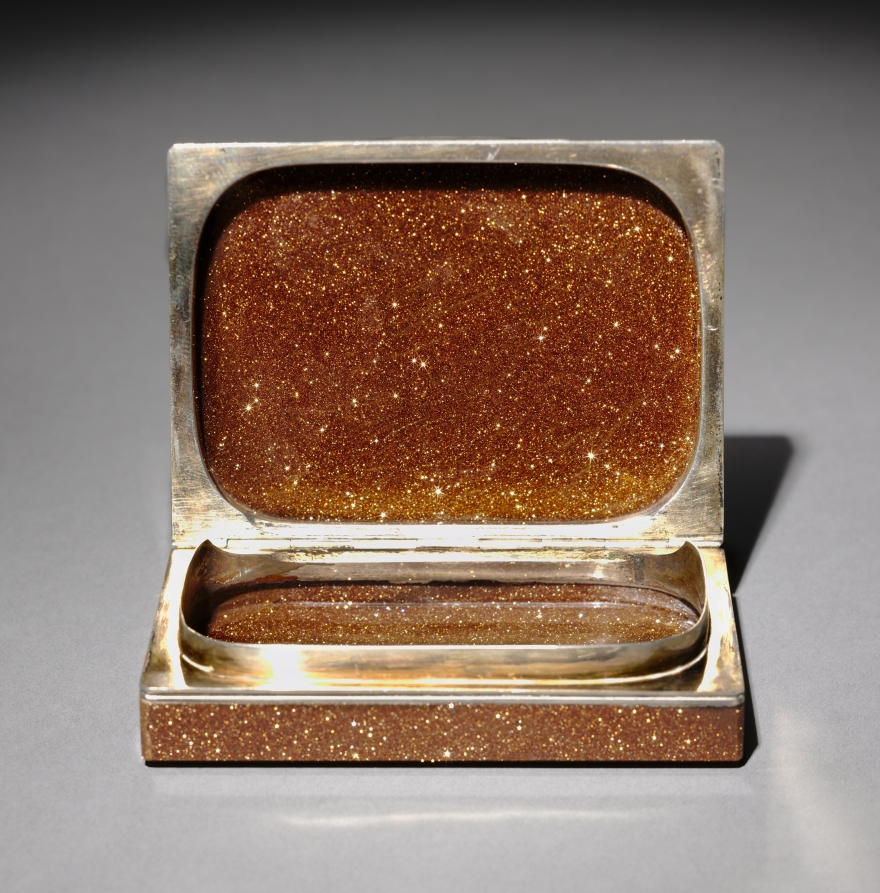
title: Snuff Box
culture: Italy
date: 1860–70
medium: goldstone, gold, micro mosaic glass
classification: Enamel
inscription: no marks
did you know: Hundreds of small glass tesserae make up the central image on the cover of this snuff box.